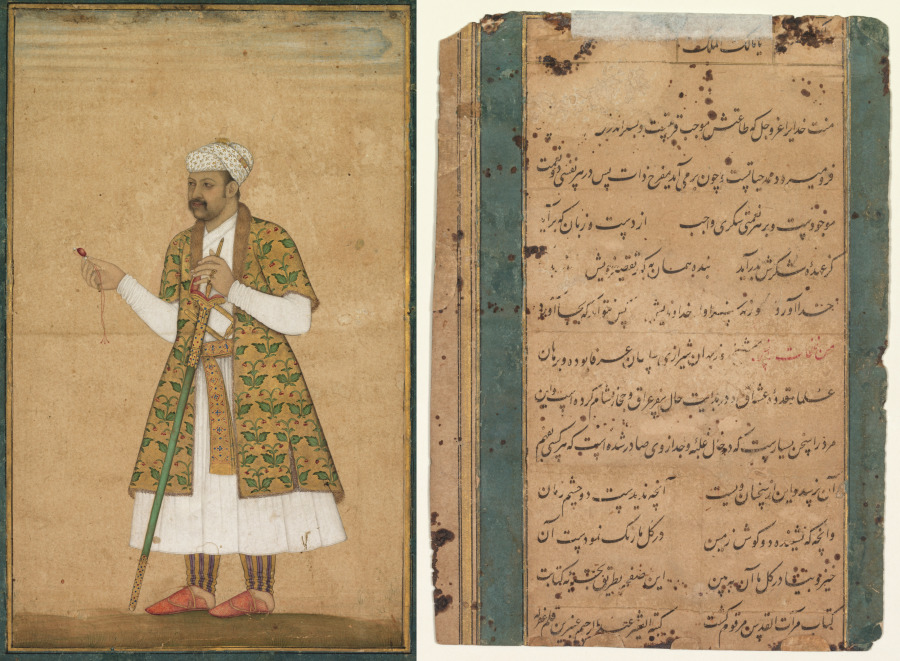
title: A Courtier, Possibly Khan Alam, Holding a Spinel and a Deccan Sword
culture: Mughal India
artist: attributed to Govardhan (Indian, active c.1596–1645)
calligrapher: Abd al-Rahim, the Anbarin-Qalam (Indian, active c. 1590–1630)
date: c. 1605–10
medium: gum tempera, ink, and gold on paper, text on verso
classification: Painting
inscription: Verso: A tahshiyya (marginal addendum) in rhymed prose from the Gulistan (Rose Garden) of Sa‘di (Persian, 1210–1291) and the Nafahat al-Uns (Breaths of Fellowship) of Abd al-Rahman Jami (Persian, 1414–1492), c. 1605, Abd al-Rahim, the Anbarin-Qalam (Indian, active c. 1590–1630), Mughal court; In nast’aliq script: O Lord of the all dominions Praise and thanks to God—may he be honored and glorified!—whose worship brings one closer to him and giving thanks [to him] increases his bounty. [Each breath] that one inhales, prolongs life, and when exhaled a rejuvenation of the soul. Thus each breath contains two blessings, and on each blessing gratitude is due. Who is able, by word or deed, to fulfill the task of paying him due thanks? It is more apt for his slaves to seek at the Divine court pardon for their shortcomings, for what truly is worth his lordship none can render adequately. Persian verses from the Nafahat al-uns quoting a poem by the mystic Sheikh Ruzbihan of Shiraz (Persian, 1128–1209), in nast’aliq script: That which has not been visible to the eye of time; That which has not been audible to the ears of the earth; Has manifested itself in the clay of my being. Come at once and see it in my clay.This page has been written as marginalia to the book Mir’at al-quds [Mirror of Holiness],written by the wretched Abd al-Rahim Anbarin-Qalam, may God forgive his sins.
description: According to Akbar's court historian, the emperor ordered likenesses to be taken of the grandees of his realm. "An immense album was thus formed: those that have passed away have received a new life, and those who are still alive have immortality promised them." Akbar's son and successor, Jahangir (reigned 1605-27), continued the tradition of commissioning works of lifelike portraiture for inclusion in imperial albums. This courtier wears an opulent fur-trimmed, fringed velvet coat over his belted white tunic and striped pants-the typical Mughal dress derived from their roots among the nomadic horse-riding people of Central Asia. The artist has reveled in creating the soft textures of the facial hair, fur and fabrics. He holds a ruby-like gemstone called a spinel, which was prized among the Mughals for its talismanic properties of protection during battle.